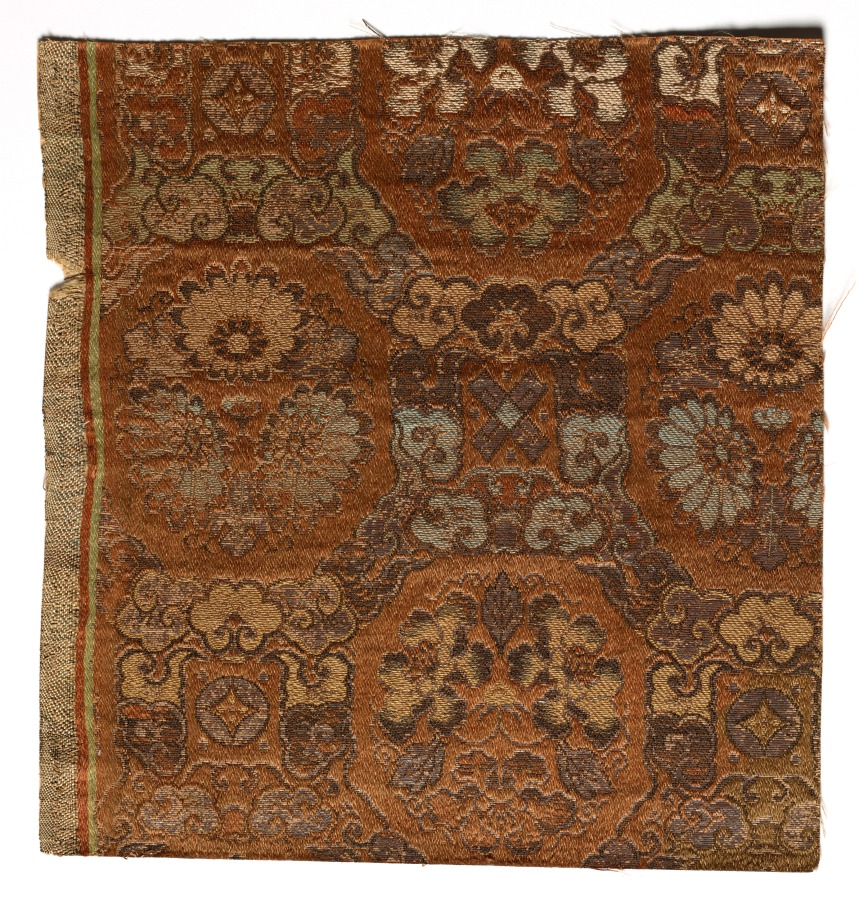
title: Textile Fragment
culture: Japan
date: 1800s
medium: silk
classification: Textile